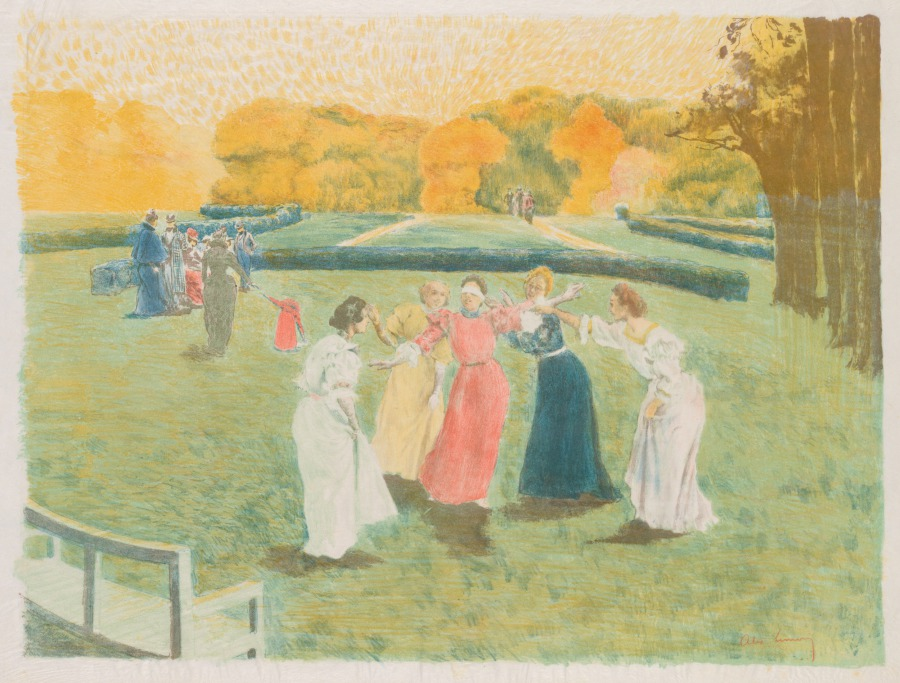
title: Blind Man's Bluff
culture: France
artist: Alexandre Lunois (French, 1863–1916)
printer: Auguste Clot (French, 1858–1936)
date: 1897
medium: color lithograph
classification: Print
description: This print depicts a group of women enjoying blind man's bluff, a children's game in which one player is blindfolded and spun around before attempting to locate their companions by listening for their voices. The group gathers in a landscaped park, one of numerous sites for public leisure available to Parisians during the late 19th century. Lunois used vivid tones, such as green and yellow, to evoke the brightness of natural light. He relied upon his expertise in color lithography, a medium previously used for commercial printing, such as posters and booklets, that grew in popularity among artists during the 1890s.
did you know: Alexandre Lunois began his career as a printmaker copying the works of other artists, but began to make his own original lithographs using his professional training around the time this work was made.